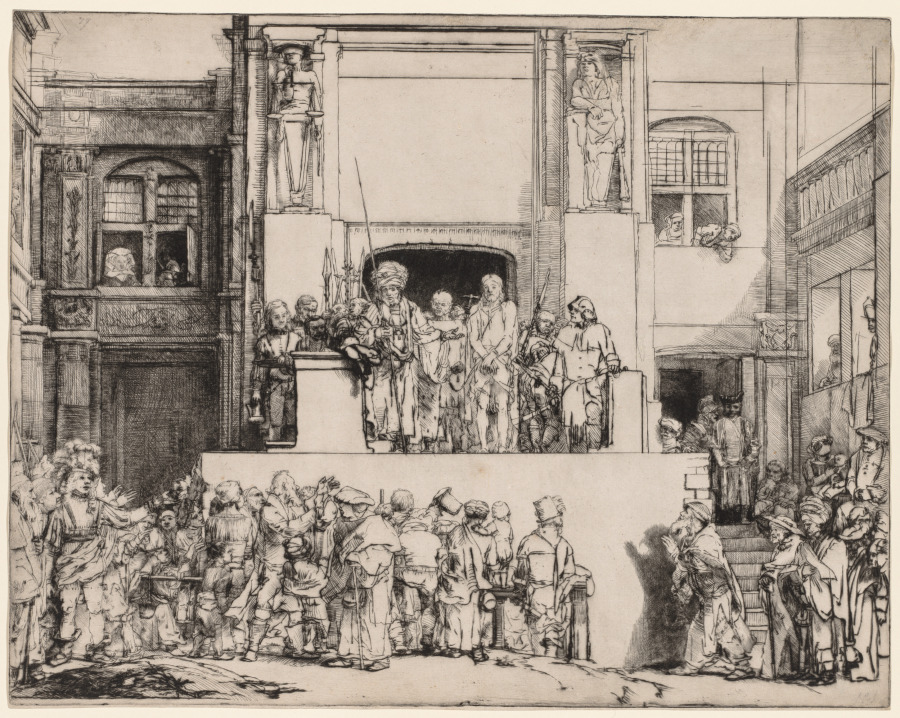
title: Ecce Homo. Christ Presented to the People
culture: Netherlands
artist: Rembrandt van Rijn (Dutch, 1606–1669)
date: 1655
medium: drypoint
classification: Print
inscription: Recto, upper left, in graphite: 79; lower left: FPS. Verso, in purple ink: Prince of Liechtenstein or Colnaghi for Liechtenstein stamp; in black ink, Zinser stamp, castle tower (rook chess piece); along side, in graphite: No. 36; along top: (illegible) name; upper left, in graphite: No 79 P(?) G (?) La Second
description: Rembrandt was an experimental and innovative printmaker and the first to execute works in pure drypoint on this monumental scale. Drypoint produces blurred lines and rich, velvety shadows, but these effects are lost as the plate wears. A limited number of rich impressions exist like this fine example of the fifth state, which demonstrates how Rembrandt redefined the expressive potential of printmaking. Rembrandt’s habit of drawing from life made him a keen observer of behavior and body language, endowing his biblical scenes with a human dimension and veracity not seen previously. The throng in Christ Presented to the People represents a cross section of the population and reflects the pictorial tradition that common humanity condemned Christ. Large areas of the imposing building, symbolizing the crushing weight and authority of the state, remain unworked so that blank white paper seems radiant in contrast to rich black shadows.